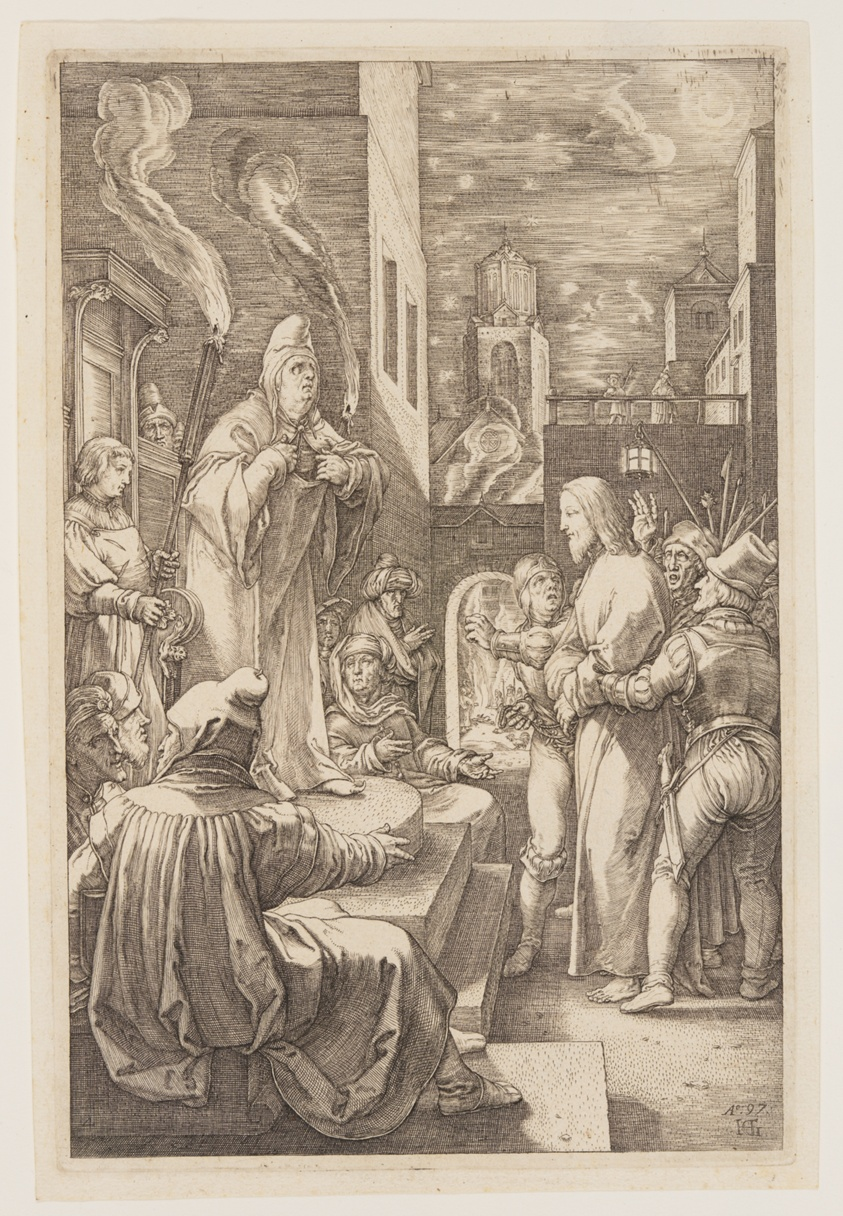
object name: Print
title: Christ before Caiaphas, from The Passion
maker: Hendrick Goltzius (Dutch, 1558–1617)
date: 1597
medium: Engraving on ivory laid paper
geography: Netherlands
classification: engraving; paper; print; prints and drawing